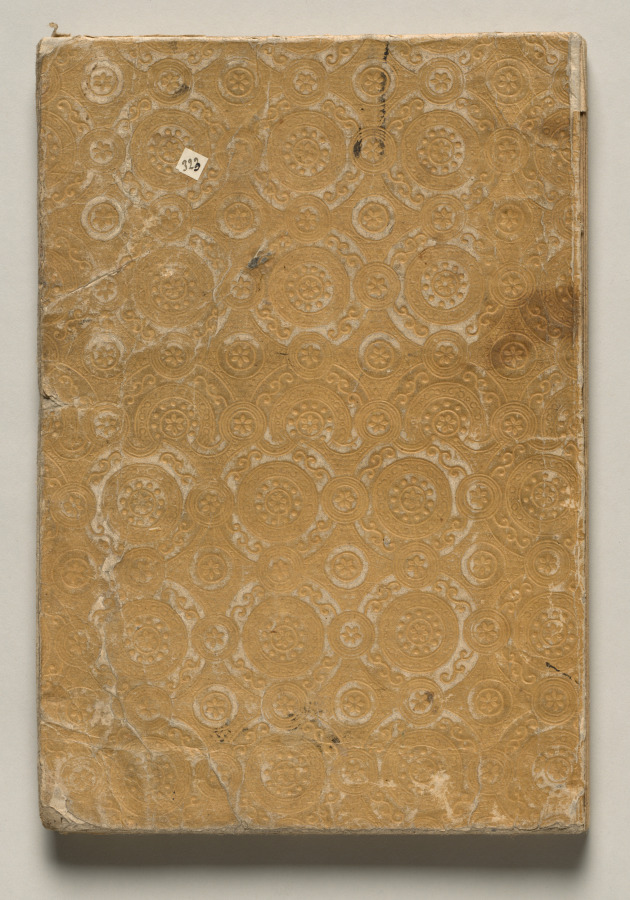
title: Ōkyo Picture Book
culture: Japan, Edo period (1615–1868)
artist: after Maruyama Ōkyo (Japanese, 1733–1795)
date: 1850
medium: accordion-style woodblock printed folding-book; ink and color on paper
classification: Bound Volume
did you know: This impression of a book of woodblock-printed designs is missing a spread that depicts a crane.